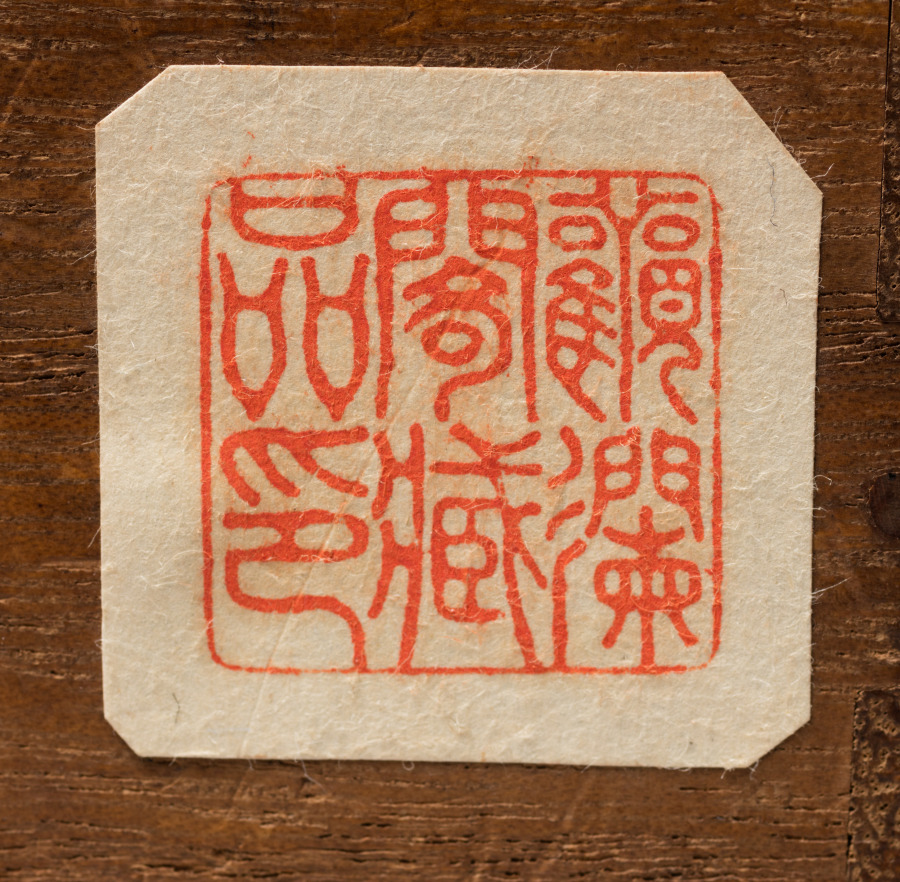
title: Gibbons Reaching for the Moon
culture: Japan, Edo period (1615–1868)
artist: Kano Tan’yū (Japanese, 1602–1674)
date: 1600s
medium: Hanging scroll; ink and light color on silk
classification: Painting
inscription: signed: "Tan'yūsai hitsu"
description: Long-armed gibbons form a chain to reach down from a tree, hoping to touch what they believe is the moon. In fact, the orb remaining beyond their grasp is the full moon’s reflection in the still surface of a pond or lake. The image is a common metaphor for the deluded mind in Buddhist thought. Gibbons do not live in Japan but were known to Japanese painters of the premodern era through paintings brought from China.